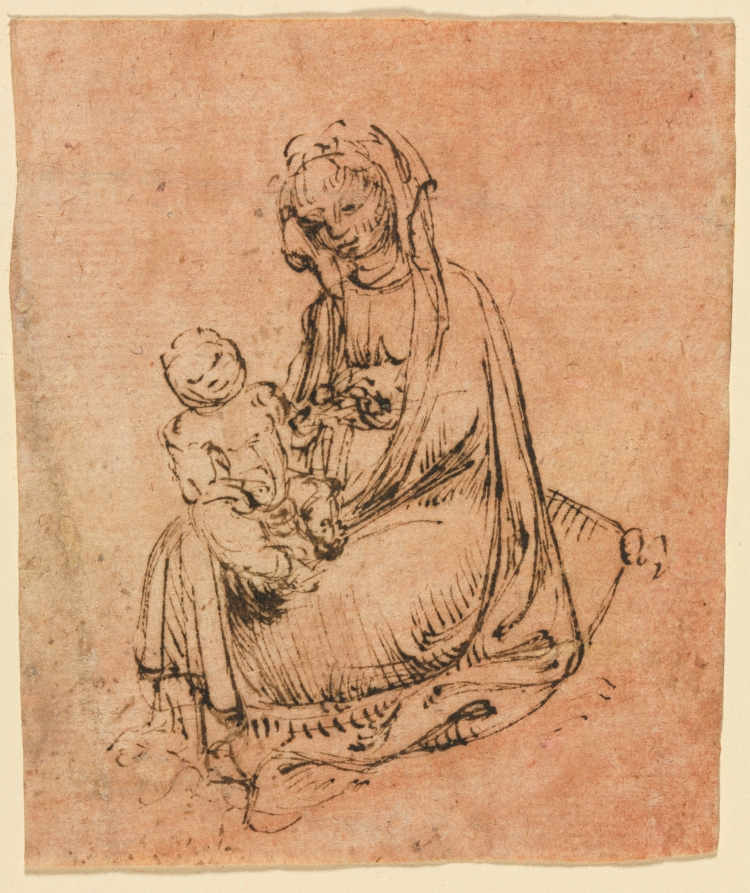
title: Madonna and Child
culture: Italy, Verona, 15th century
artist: follower of Stefano da Zevio (Italian, c. 1374-after 1438)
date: c. 1440/50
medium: pen and brown ink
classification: Drawing